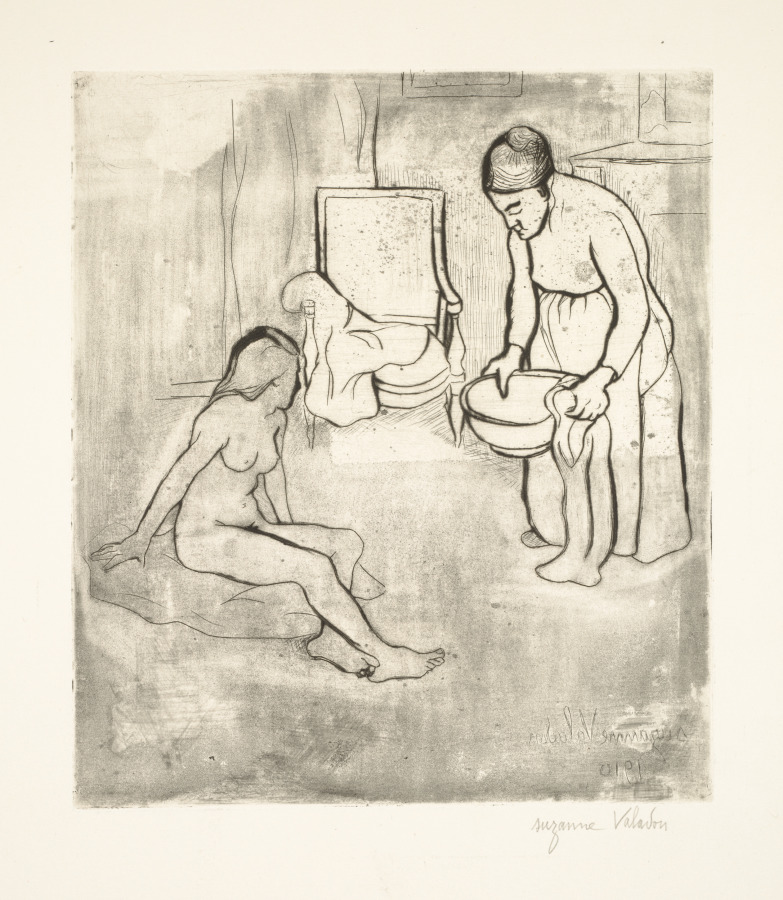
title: Grandmother with Louise, Nude Seated on the Floor (Grand-Mère et Louise Nue Assise par Terre)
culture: France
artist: Suzanne Valadon (French, 1865–1938)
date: 1910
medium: Drypoint, etching, and aquatint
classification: Print